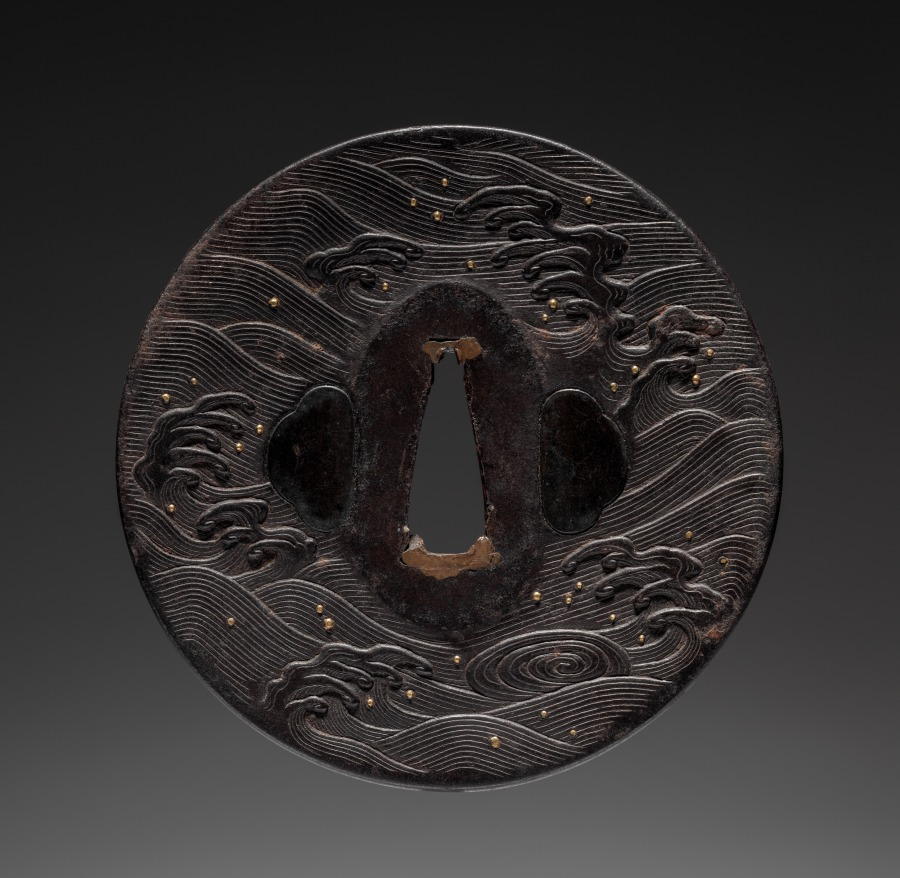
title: Sword Guard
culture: Japan, Edo period (1615–1868)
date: late 1600s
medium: iron with gold inlay (Choshu type)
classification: Arms and Armor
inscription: signed "Tomotsugu, residing at Hagi, Nagato province, made."